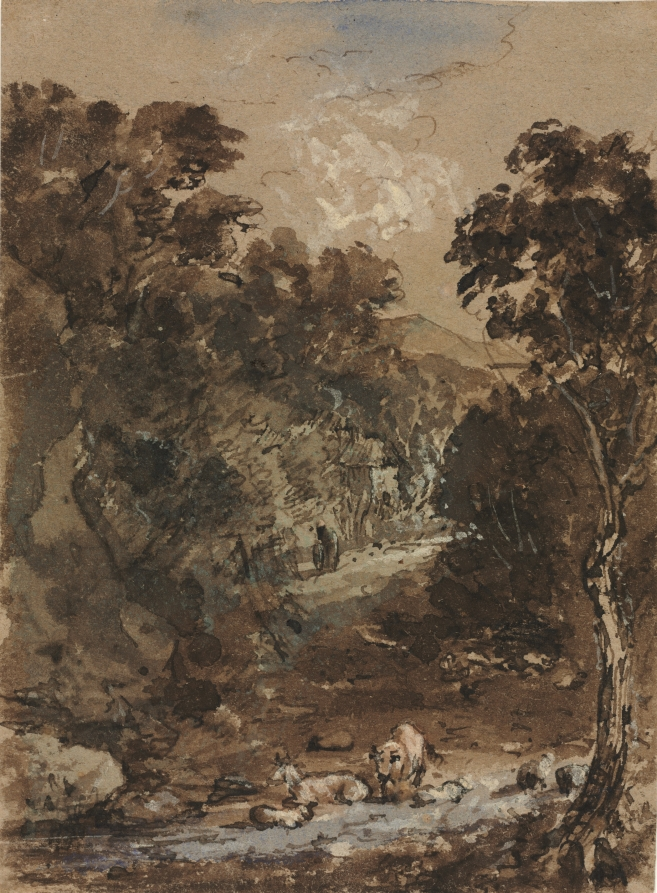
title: Landscape with Farm Animals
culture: England, 19th century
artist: Benjamin Barker (British, 1776–1838)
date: c. 1796–1838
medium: ink and watercolor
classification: Drawing